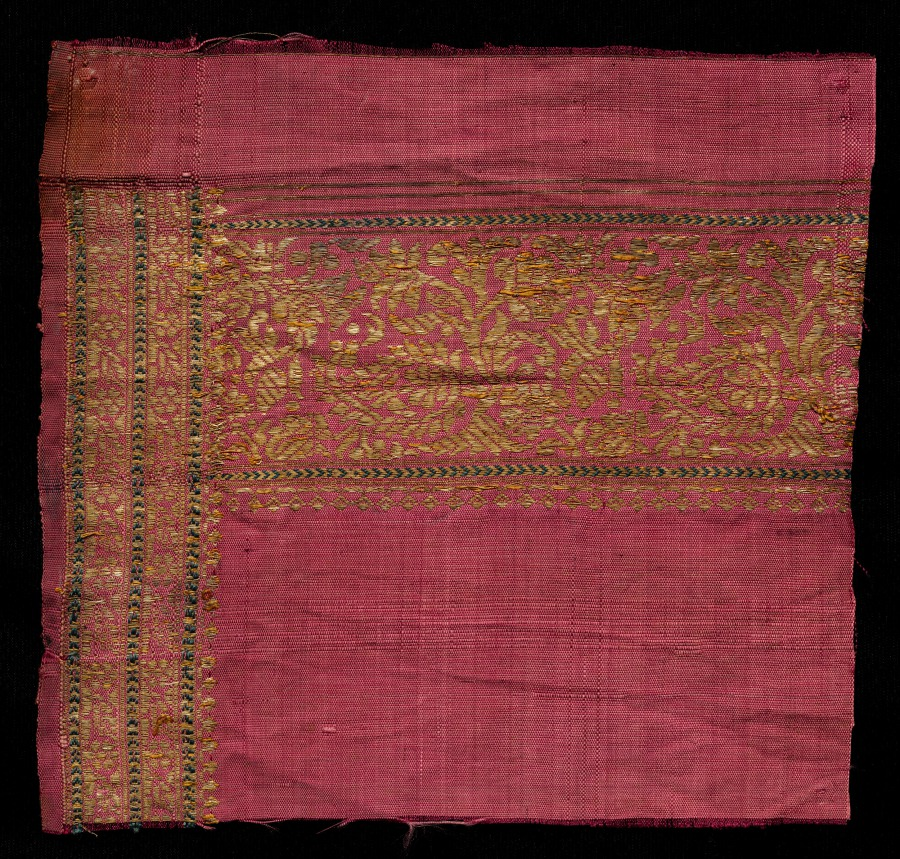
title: Sari (Fragment)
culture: India, 19th century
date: 1800s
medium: brocade; silk and metal thread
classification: Textile